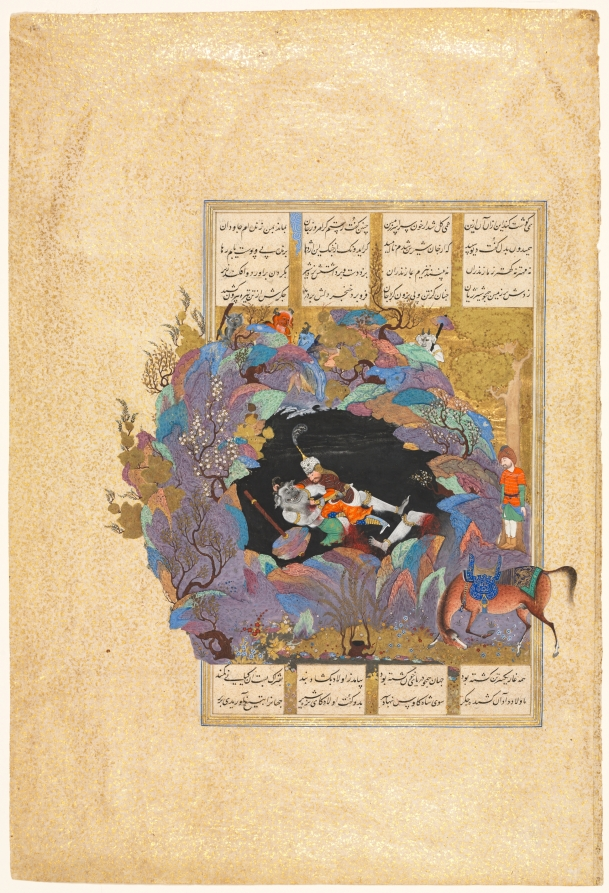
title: Rustam's seventh course: He kills the White Div, folio 124 from a Shah-nama (Book of Kings) of Firdausi (Persian, about 934–1020)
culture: Iran, Tabriz, Safavid period (1501-1722)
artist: attributed to Abd al-Vahhab (Persian, active about 1516)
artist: attributed to Mir Musavvir (Iranian, c. 1510–1555)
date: 1522–37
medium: Gum tempera, ink, gold, and silver on paper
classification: Manuscript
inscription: Script: Nasta'liq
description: The legendary hero Rustam brutally takes the demon chief’s liver blood, needed to cure his king of blindness. Paintings from the Shah-nama made for the Persian ruler Shah Tahmasp (reigned 1524–76) were acclaimed in their day for their brilliant coloring and refinement. Seven of the artists who contributed to this book moved to India to lead the new Mughal painting workshop in the 1550s. They introduced to the Indian artists a more complex color sensibility and preference for presenting faces in three-quarter view, as opposed to in profile.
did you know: Devils in the details: three peer into the White Div’s lair by the Caspian Sea.